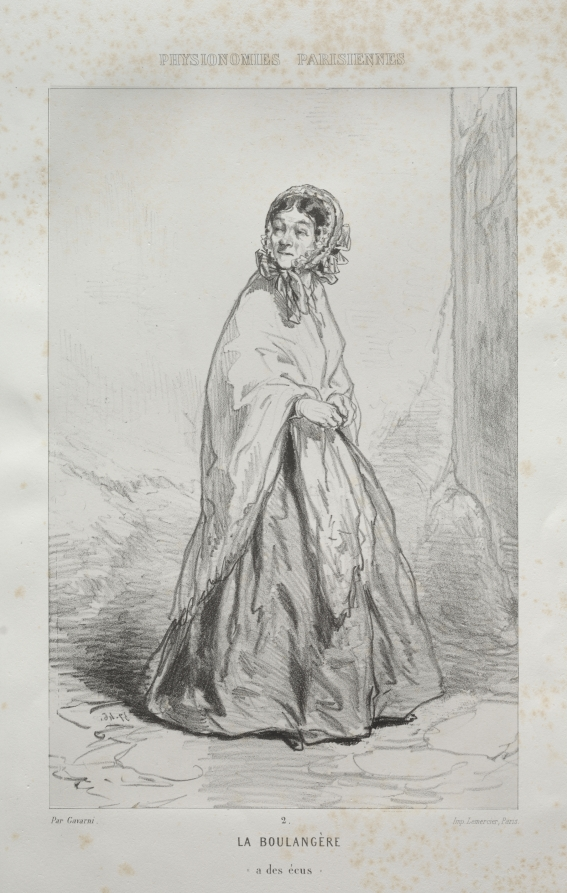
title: La Boulangère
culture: France, 19th century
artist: Paul Gavarni (French, 1804–1866)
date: c. 1857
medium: lithograph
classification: Print